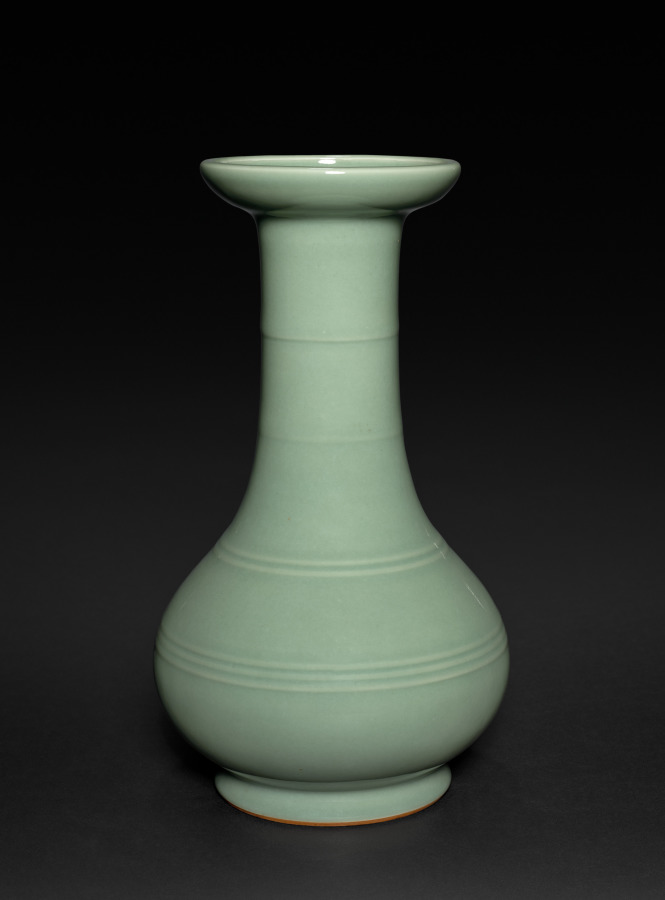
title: Vase with Bamboo Joints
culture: Japan, Taishō period (1912–26)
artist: Seifū Yohei IV (Japanese, 1872–1951)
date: 1914–46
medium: Porcelain with green glaze and molded design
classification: Ceramic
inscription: 清風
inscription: 清風造【印】清風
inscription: 成山清風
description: Yohei IV’s Vase with Bamboo Joints has a shape often seen in pairs of bronze flower vases placed to either side of Buddhist altars before sculptural icons. While the term hisoku (Chinese mise 秘色), or “mysterious color” glazing, indicates a more specific green color than seiji 青磁, a more general word for green-glazed porcelain, there is still some range in the actual color of the glaze.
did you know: Many ceramics created by the Seifū Studio refer to and emulate Chinese ceramics in form and glazing.